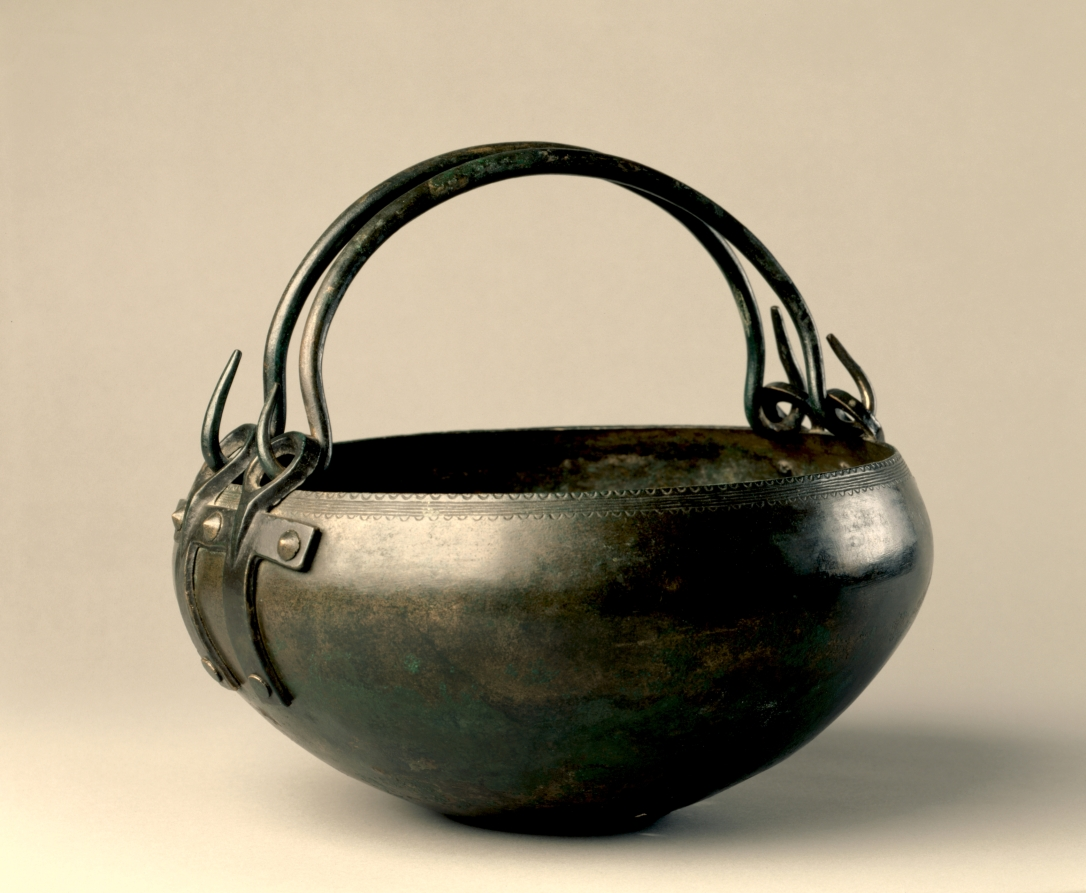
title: Ritual Cauldron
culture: Hungary, Bronze Age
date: c. 1000–900 BCE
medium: bronze, hammered, cast and wrought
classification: Metalwork